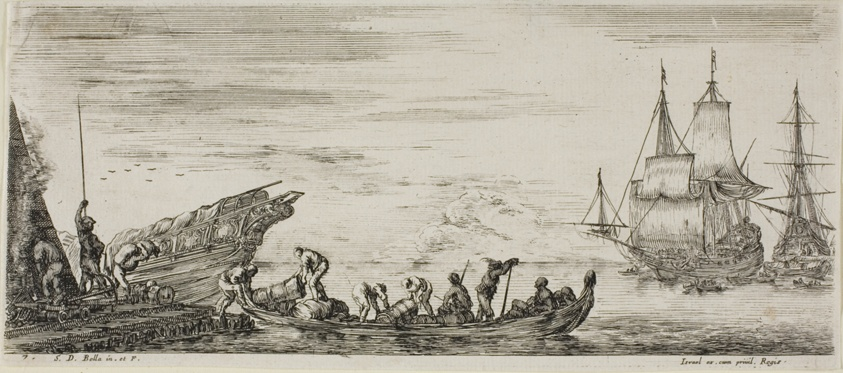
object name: Print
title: Plate Seven from Various Embarkments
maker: Stefano della Bella (Italian, 1610-1664)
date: c. 1640/50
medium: Etching on ivory laid paper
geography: Italy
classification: etching; paper; print; prints and drawing